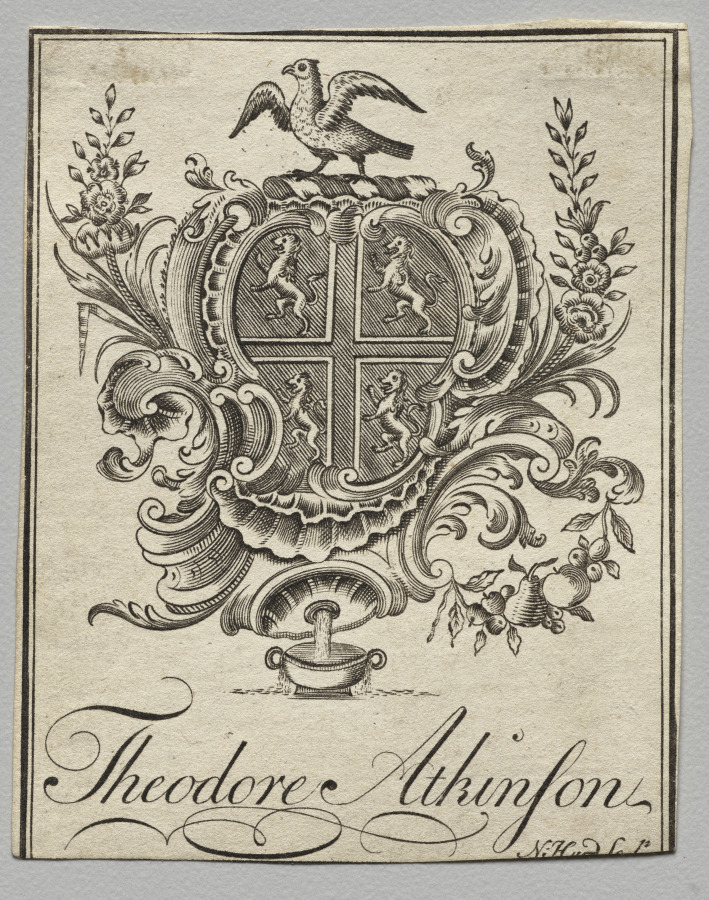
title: Bookplate: Coat of Arms with Theodore Atkinson inscribed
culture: America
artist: Nathaniel Hurd (American, 1730–1778)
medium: engraving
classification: Print